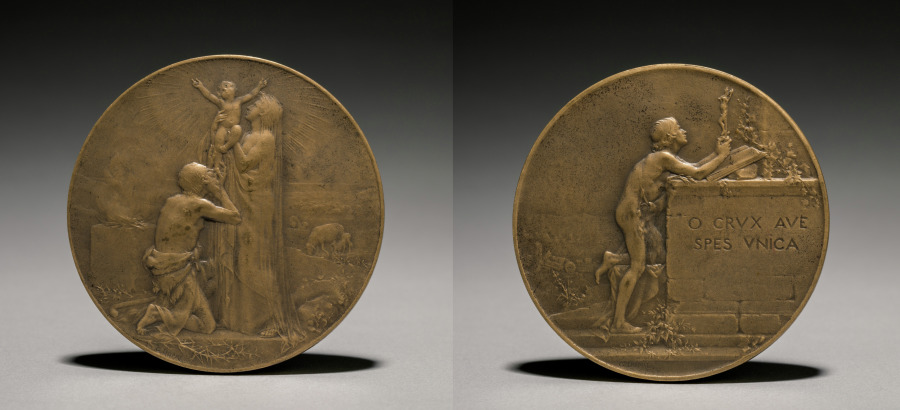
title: Medal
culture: France, 19th century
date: 1800s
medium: bronze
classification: Metalwork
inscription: reverse - "O Crux ave spes unica."